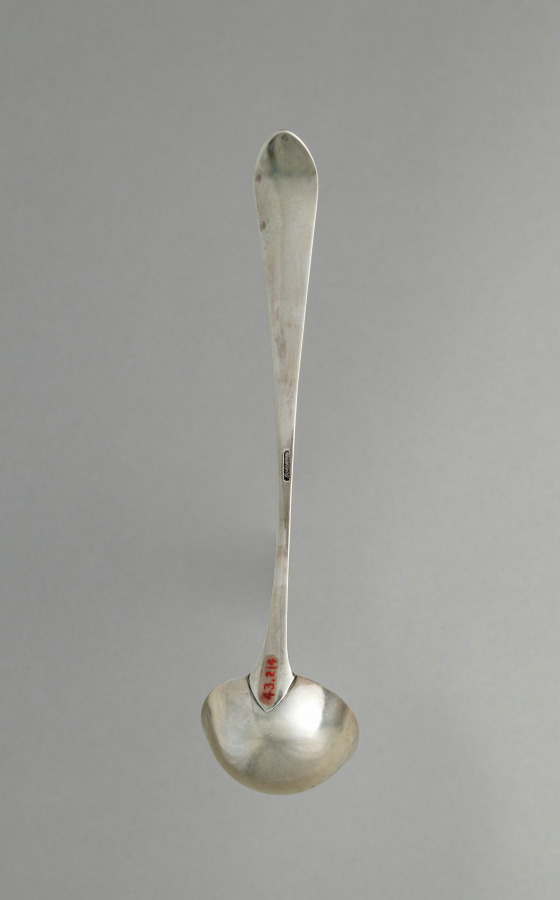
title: Ladle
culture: America, Maryland, Baltimore, late 18th Century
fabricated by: George Aiken (American, 1765–1832)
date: c. 1790–1800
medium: silver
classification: Silver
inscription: engraved "B" in bright-cut script on top of handle end.